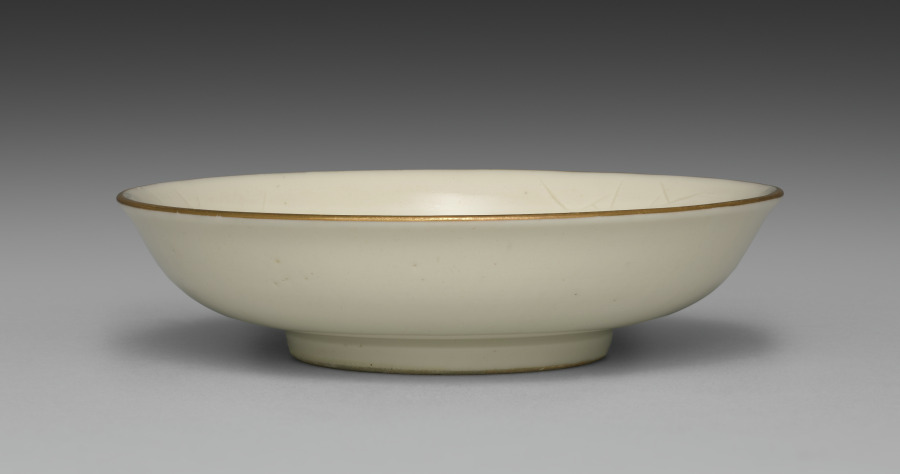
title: Small Dish from Dining Set with Plum Blossoms and Cracked-Ice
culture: Japan, Meiji period (1868–1912)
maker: Seifū Yohei II (Japanese, 1844–1878)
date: c. 1875–78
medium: Porcelain with molded designs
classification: Ceramic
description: Each item in this set has a delicate low-relief design of flowering plum branches over scattered, intersecting lines meant to resemble the cracked-ice surface of a frozen body of water and is signed on the base in gold pigment. While Yohei II produced many fine works in underglaze blue, like those produced by Kiyomizu Shichibei, he also made works in quite different styles later in his career, from the early 1870 s. In 1873, he was appointed purveyor to the Industrial Center of Kyoto Prefecture, a designation associated with Kyoto’s efforts to reach an international market through the port of Kobe; and from 1875 until his death, he was involved in national-level projects to present Japanese ceramics across the world. It was during this period that Yohei III was apprenticed to Yohei II, and it has been suggested that this set may in fact be an early example of Yohei III’s work, which he signed with his teacher’s name. Decorated with flowers resembling Japanese textile motifs, the set calls to mind the design of Yohei II’s pair of vases with plum blossoms in the Victoria and Albert Museum. Here, the elaborate trees created for a formal public exhibition setting have been translated into the approachable blossoms of the genteel domestic environment. While the designs are consistent across the pieces, each raised flower petal and pistil and each incised line in the ice was done by hand, so the cups, bowls, and dishes are similar yet unique. The bottoms of two boxes once identified the set’s owner, but the information has been deliberately obscured with black ink. However, inscriptions still visible appear to indicate two occasions, once at the end of July 1886 , and once again in June 1916 , when parts of the set were requested from Hokura in Niigata Prefecture. The location corresponds to a neighborhood in the present-day city of Jōetsu. The surname Tsuji 辻 also appears on a paper tag affixed to one of the box cloths. Future research may possibly reveal more about their provenance. A vase by Yohei III in a private collection combines the formal grandeur of the Yohei II vases in the Victoria and Albert Museum with the gentler design of this dining set, placing flowering plum trees against soft, scalloped-edge clouds resembling those in golden screens.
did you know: The dining wares have a creamy white coloration that the four boxes containing them identify as Korean in style.